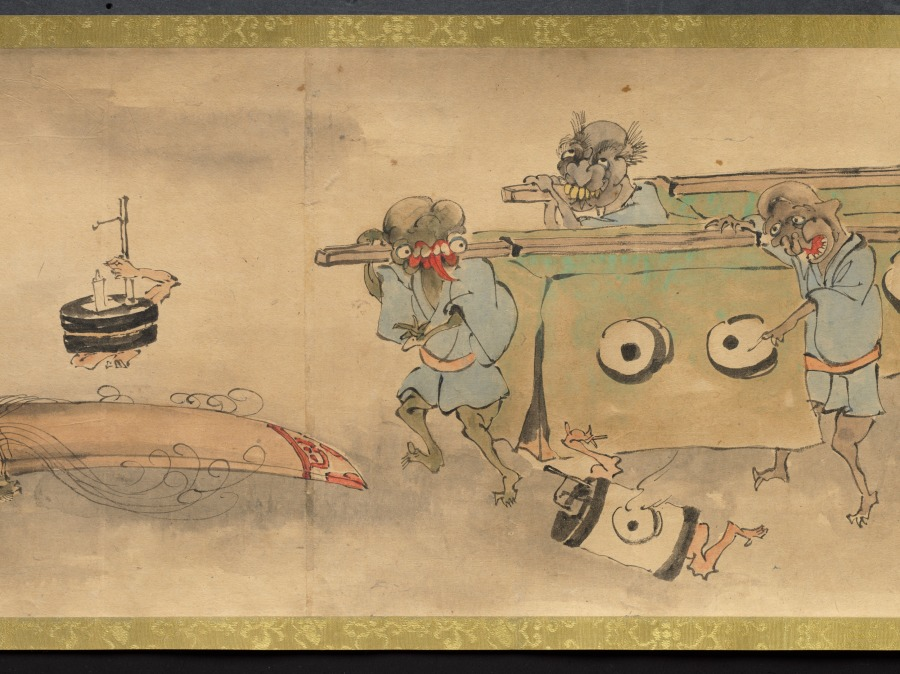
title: An Illustrated Marriage of Apparitions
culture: Japan, Edo period (1615–1868)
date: mid-1800s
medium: handscroll; ink and color on paper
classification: Painting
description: The matchmaking, engagement, wedding, and birth of the first child of two apparitions, or bakemono, literally "things that change," are illustrated in this whimsical, humorous handscroll. Japanese folklore abounds with such strange creatures, most famously represented in handscrolls featuring a procession of 100 supernatural monsters. Aside from a textual preface and cartouches indicating the content of the scenes, the tale is told visually. The artist and whereabouts of the original handscroll are unknown, but a number of other 19th-century copies by amateur painters exist in Japanese collections, attesting to its broad appeal.